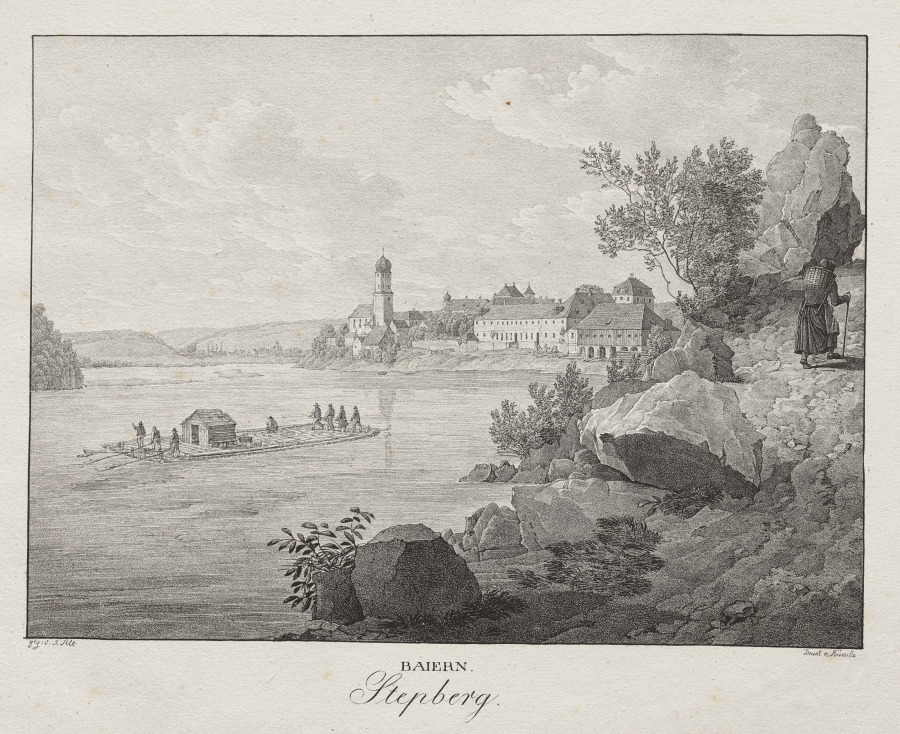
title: Baiern, Stepberg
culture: Austria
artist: Jakob Alt (Austrian, 1789–1872)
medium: lithograph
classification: Print